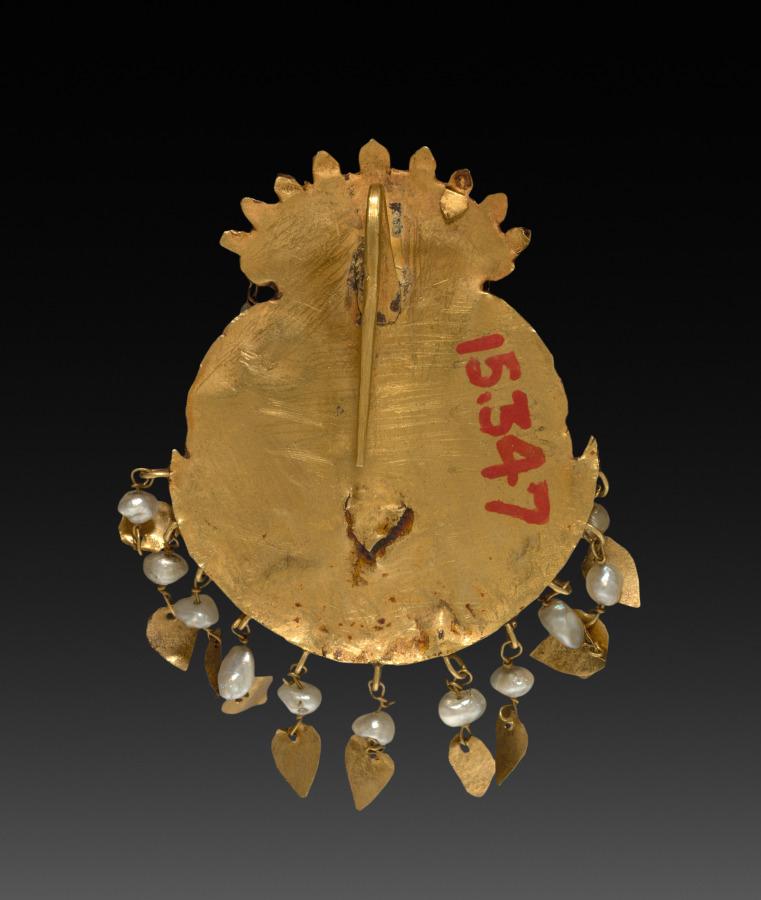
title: Earring with Four-Armed Vishnu Riding Garuda with Nagas (serpent divinities)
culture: Nepal, Kathmandu Valley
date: 1600s or 1700s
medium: repousse gold with pearls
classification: Jewelry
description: In Nepal, sculptures of deities were adorned with jewelry larger than pieces made for human beings. This pair of earrings features the Hindu god Vishnu seated cross-legged riding his mount the man-eagle Garuda. Garuda's arms are outstretched, grabbing the tails of serpents whose braided bodies snake up both sides of each earring. His wings drape like a cape behind him, and his talons clutch his crescent moon perch. Serpent hoods rise up behind Vishnu like a canopy.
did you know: Vishnu and Garuda are solar deities, and they sit on the crescent moon, so the light of both celestial bodies shines from these earrings.